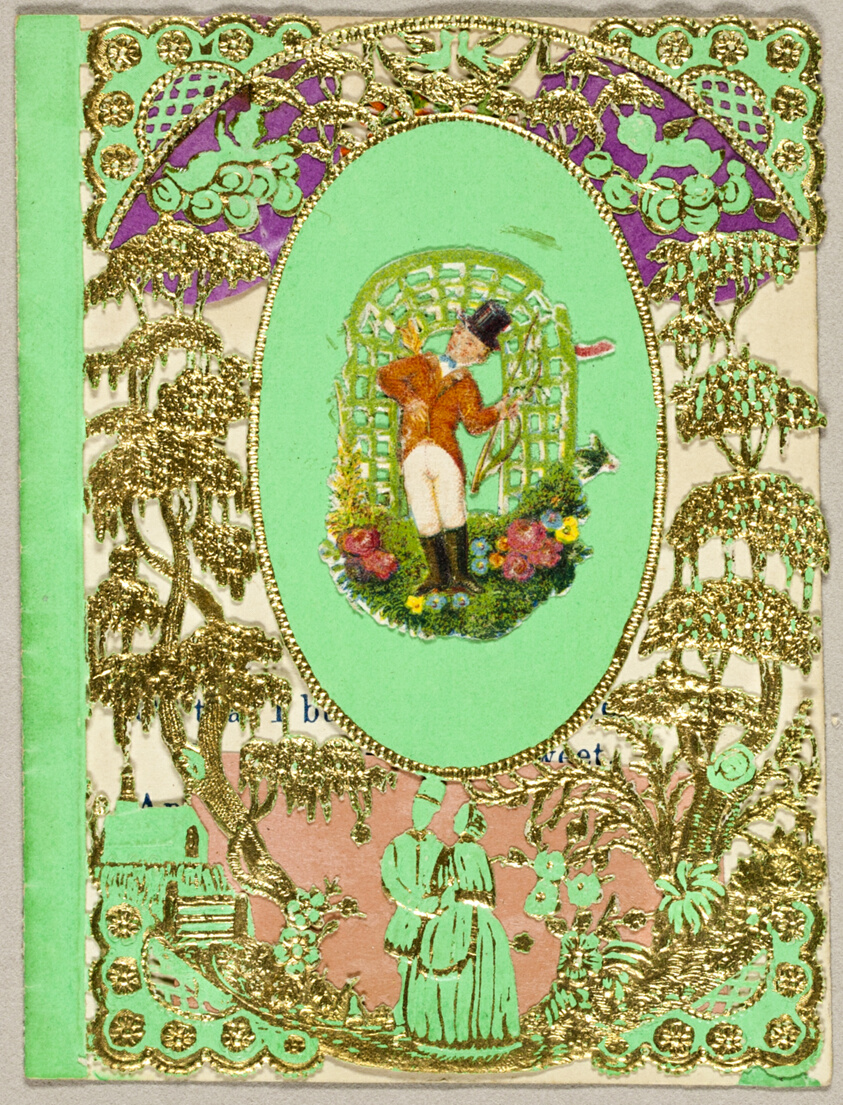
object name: Drawing and Watercolor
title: Untitled Valentine (Gentleman Under Arbor)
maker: Unknown Artist; American or English, 19th century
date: 1860/69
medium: Gold and green paint and collaged elements on cut and embossed (designed) ivory wove paper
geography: United States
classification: collage; valentine; prints and drawing; paper